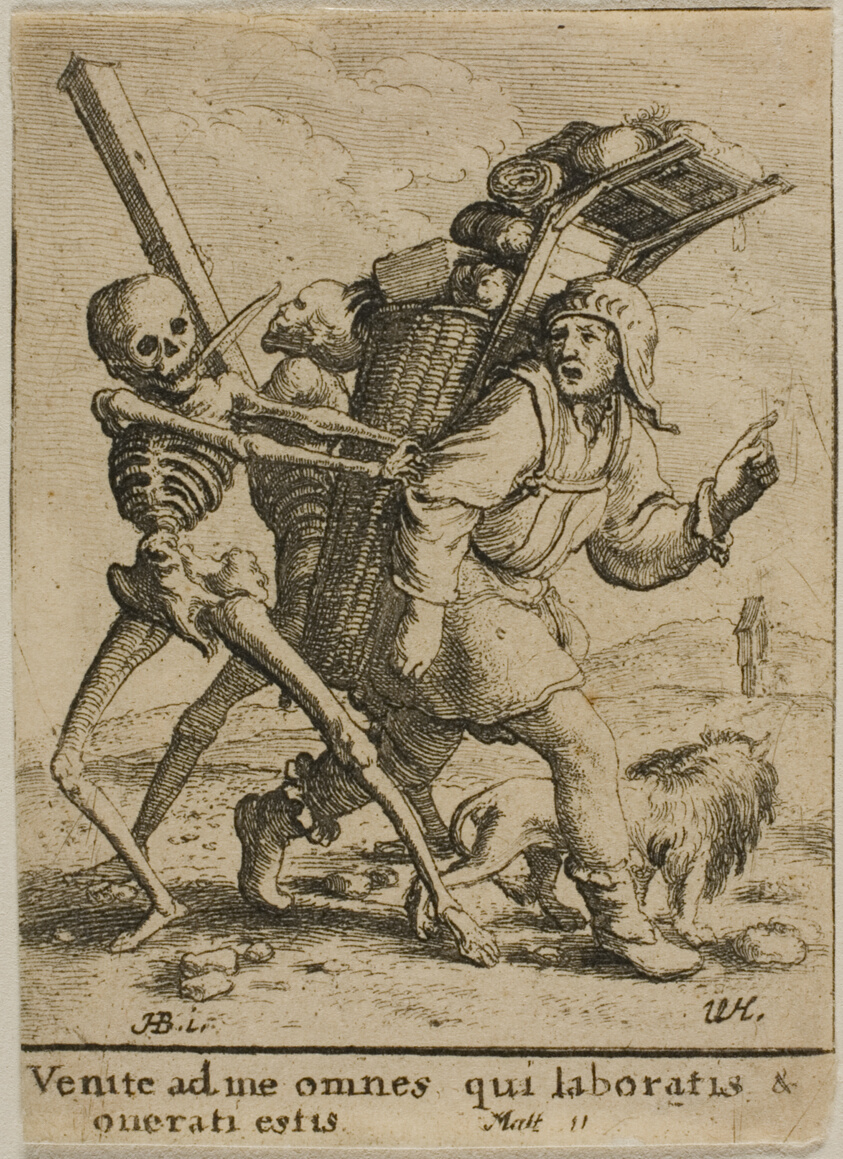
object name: Print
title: The Peddlar and Death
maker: Wenceslaus Hollar (Bohemian, 1607-1677); after Hans Holbein the younger (German, c.1497-1543)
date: 1651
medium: Etching on ivory wove paper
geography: Bohemia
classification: etching; print; prints and drawing